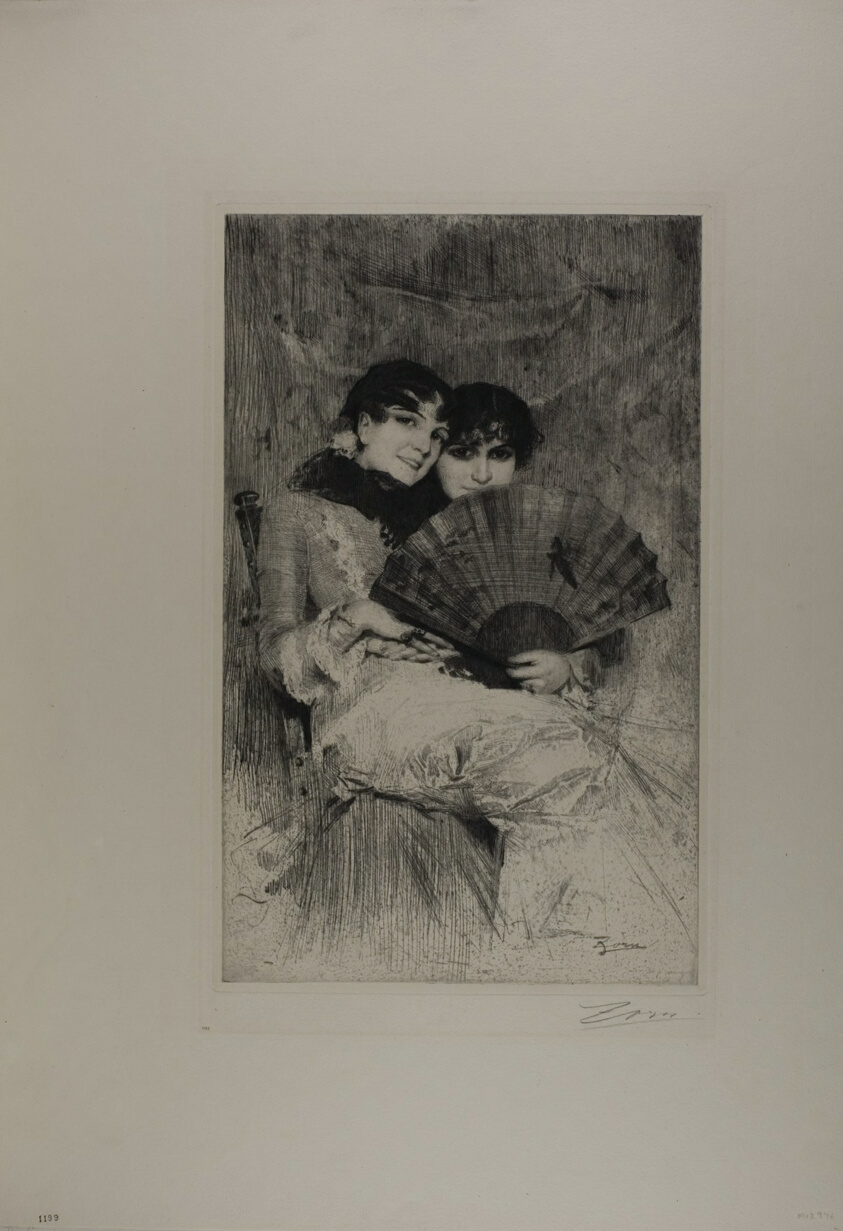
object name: Print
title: The Cousins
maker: Anders Zorn (Swedish, 1860-1920)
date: 1883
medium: Etching and drypoint on ivory wove paper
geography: Sweden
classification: etching; print; prints and drawing